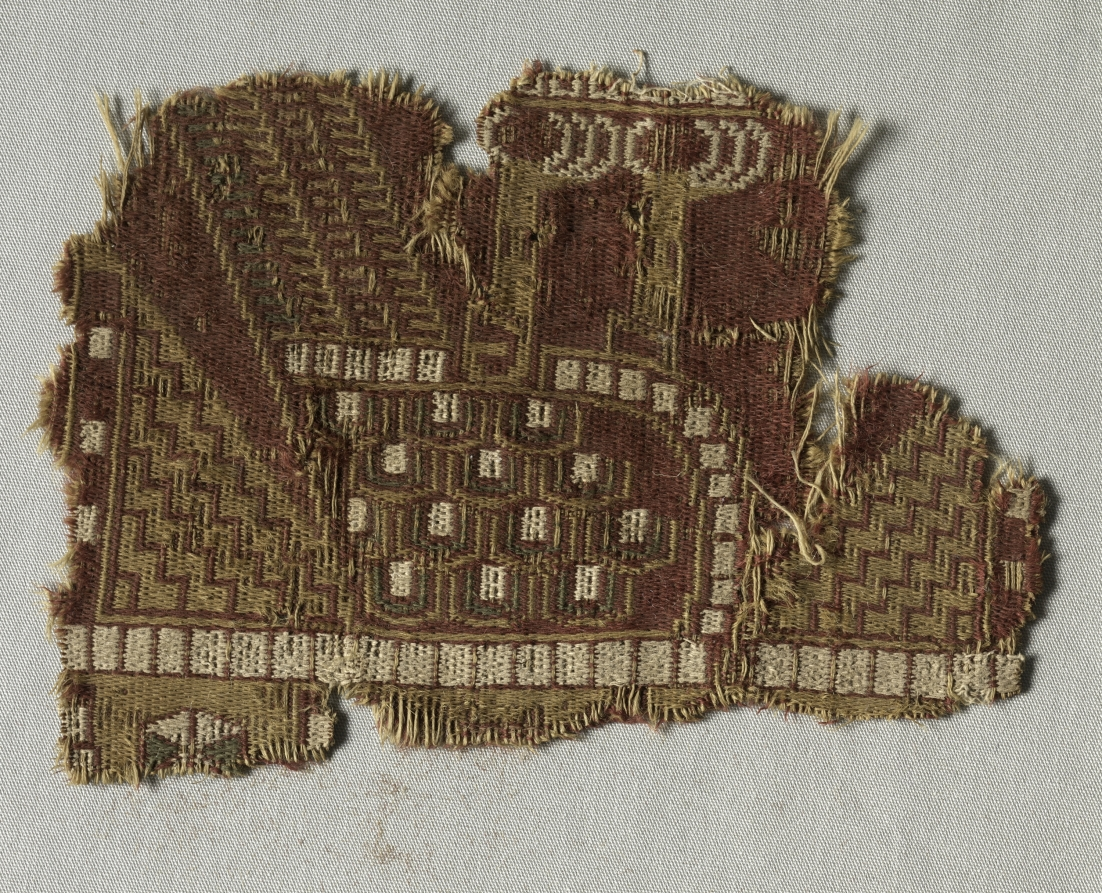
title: Fragment with headless eagle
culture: Iran, Iraq, or Syria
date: 700s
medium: samite: wool and cotton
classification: Textile